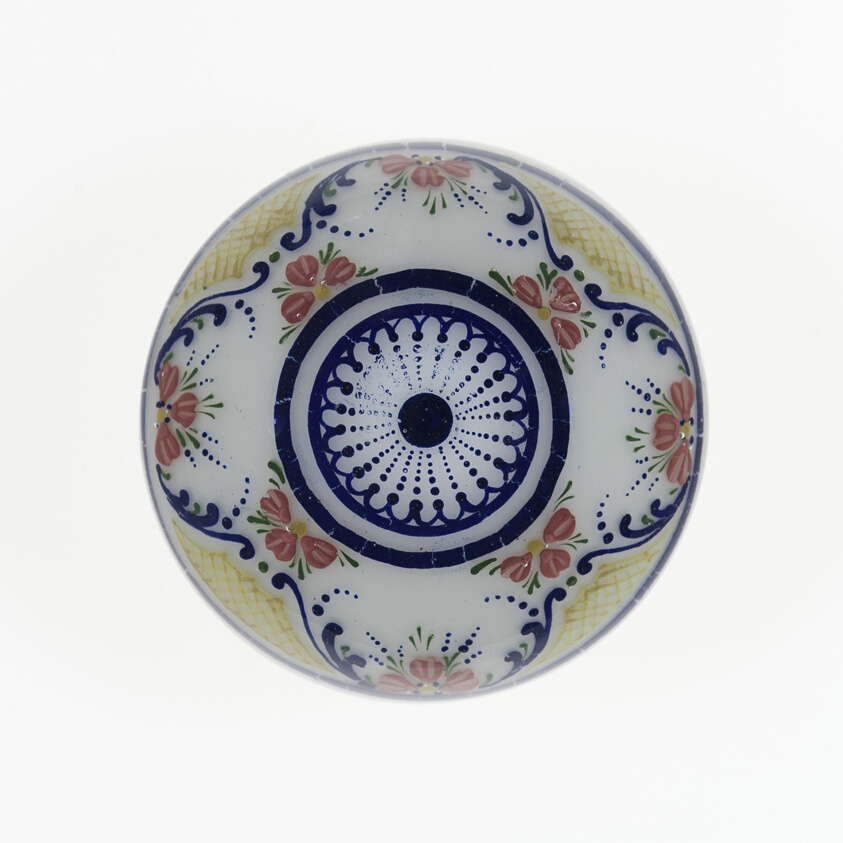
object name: Glass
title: Paperweight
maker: Possibly Bohemian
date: Mid 19th century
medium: Glass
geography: Czech Republic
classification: paperweight; glass